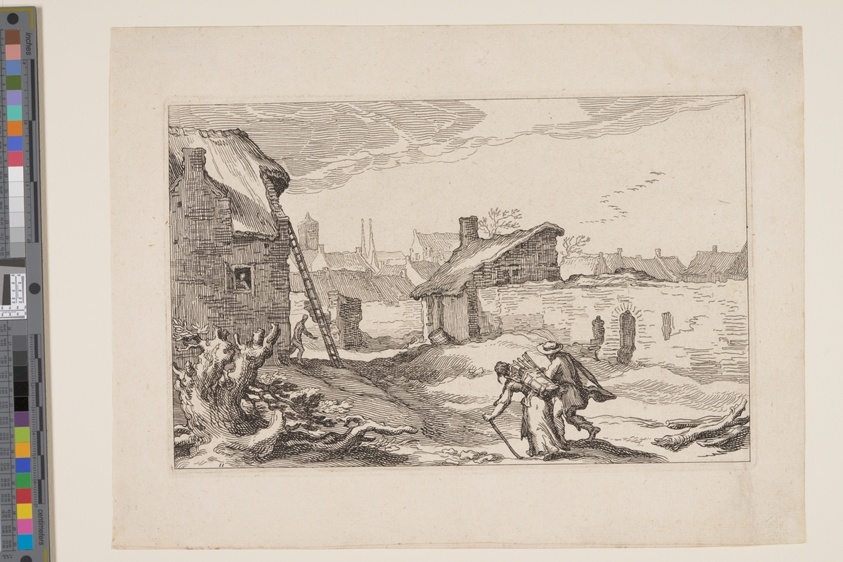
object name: Print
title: Plate 11, from Landscapes with Farmhouses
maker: Boëtius Adamsz. Bolswert (Flemish, 1580–1633); after Abraham Bloemaert (Dutch, 1566–1651)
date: 1614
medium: Etching on ivory laid paper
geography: Flanders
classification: print; paper; prints and drawing; etching